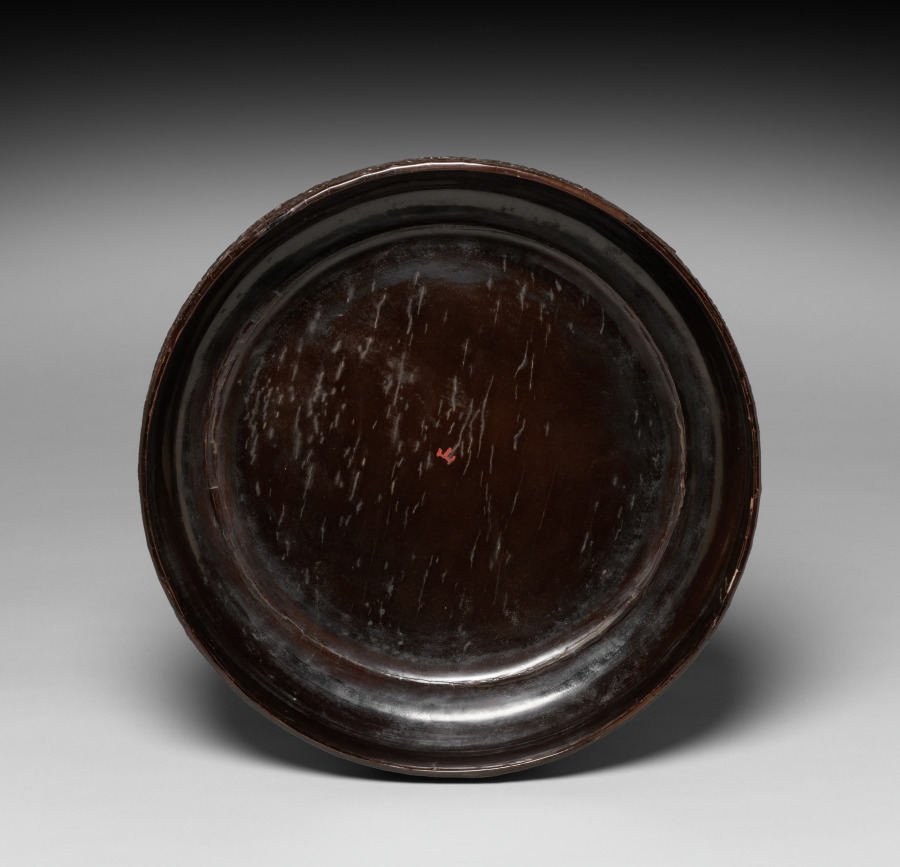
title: Round Box with Bird and Peonies Design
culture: China, late Southern Song (1127–1279) to early Yuan dynasty (1271–1368)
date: c. 1300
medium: carved lacquer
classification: Lacquer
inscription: 山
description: The carved lacquer box and lobed silver container nearby both feature pairs of birds and flowers on their covers. There is a striking similarity in decoration, shape, and aesthetic appeal. Both boxes suggest that successful designs and shapes circulated among craftsmen, workshops, and beyond regional borders.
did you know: The footring is carved with a band of continuous key-fret, above which is another band of spiral scroll pattern